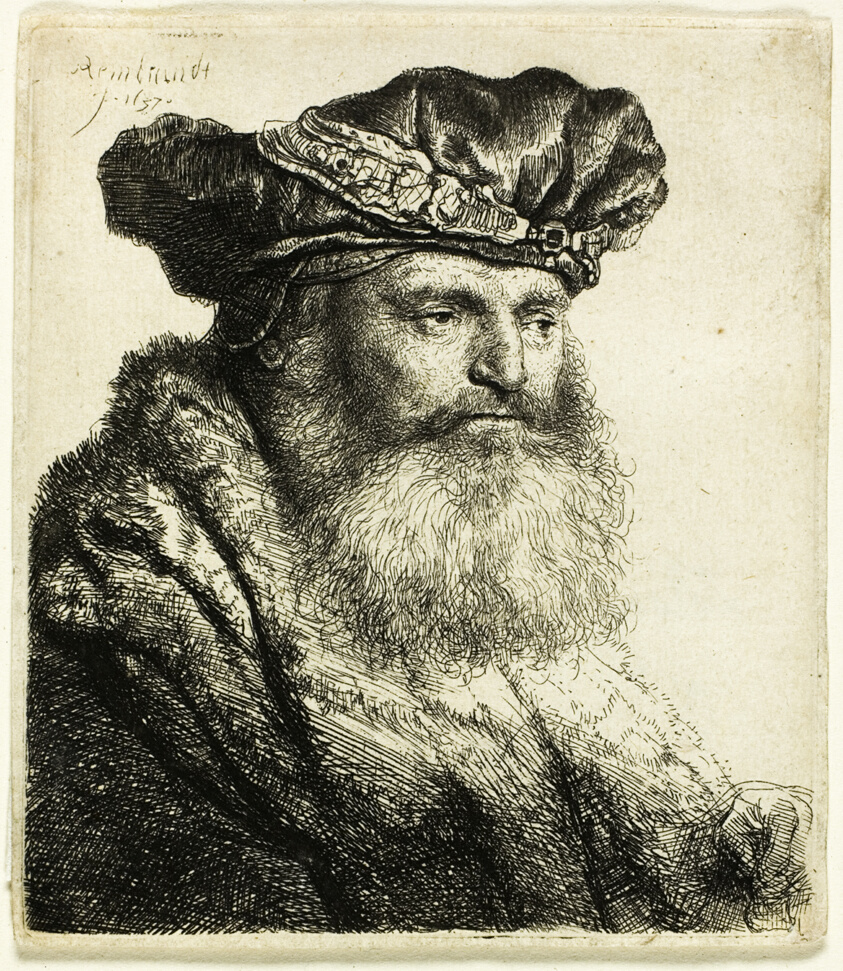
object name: Print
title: Bearded Man in a Velvet Cap with Jewel Clasp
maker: Rembrandt van Rijn (Dutch, 1606-1669)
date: 1637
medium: Etching on paper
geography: Holland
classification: etching; print; prints and drawing; paper